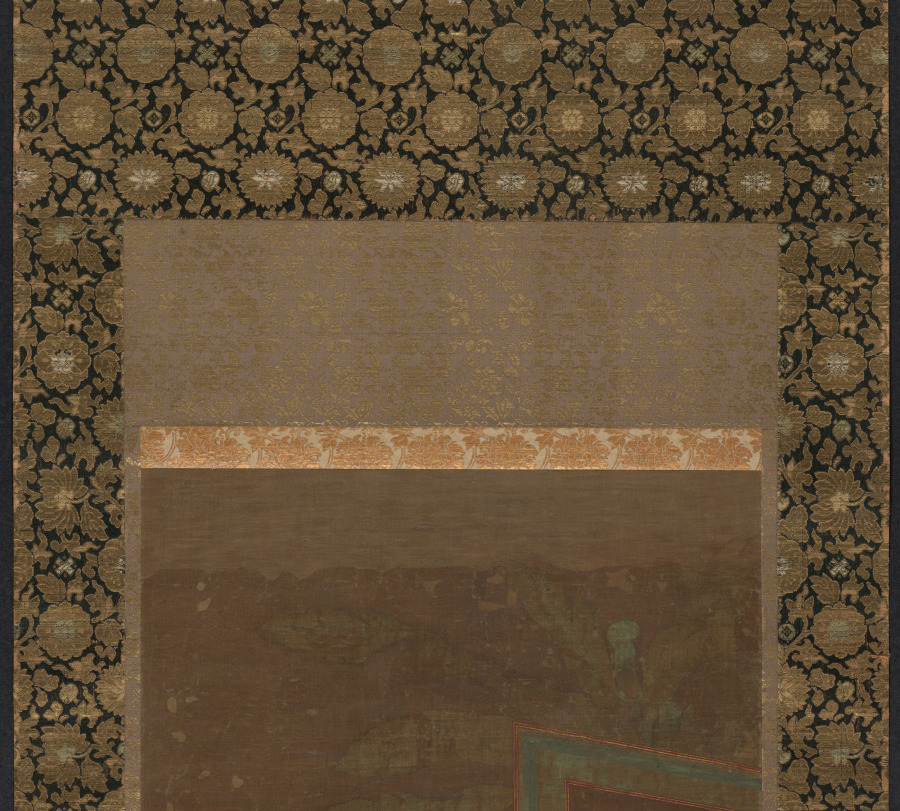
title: Seated Arhat with Two Attendants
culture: China, Southern Song dynasty (1127-1279)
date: late 1200s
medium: Hanging scroll; ink and color on silk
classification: Painting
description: Arhat, or Lohan (羅漢 in Chinese), were the disciples of the historical Buddha. Later tradition tended to picture them in sets of 16, 18, or as many as 500. This is one painting from a larger set, with a seated arhat portrayed on a grand scale, overshadowing his own attendant as well as the ferocious figure who approaches him with an offering of a wild goose.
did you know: The arhat holds a rolled up scroll, likely a sutra, and is seated before a standing screen decorated with a landscape painting.